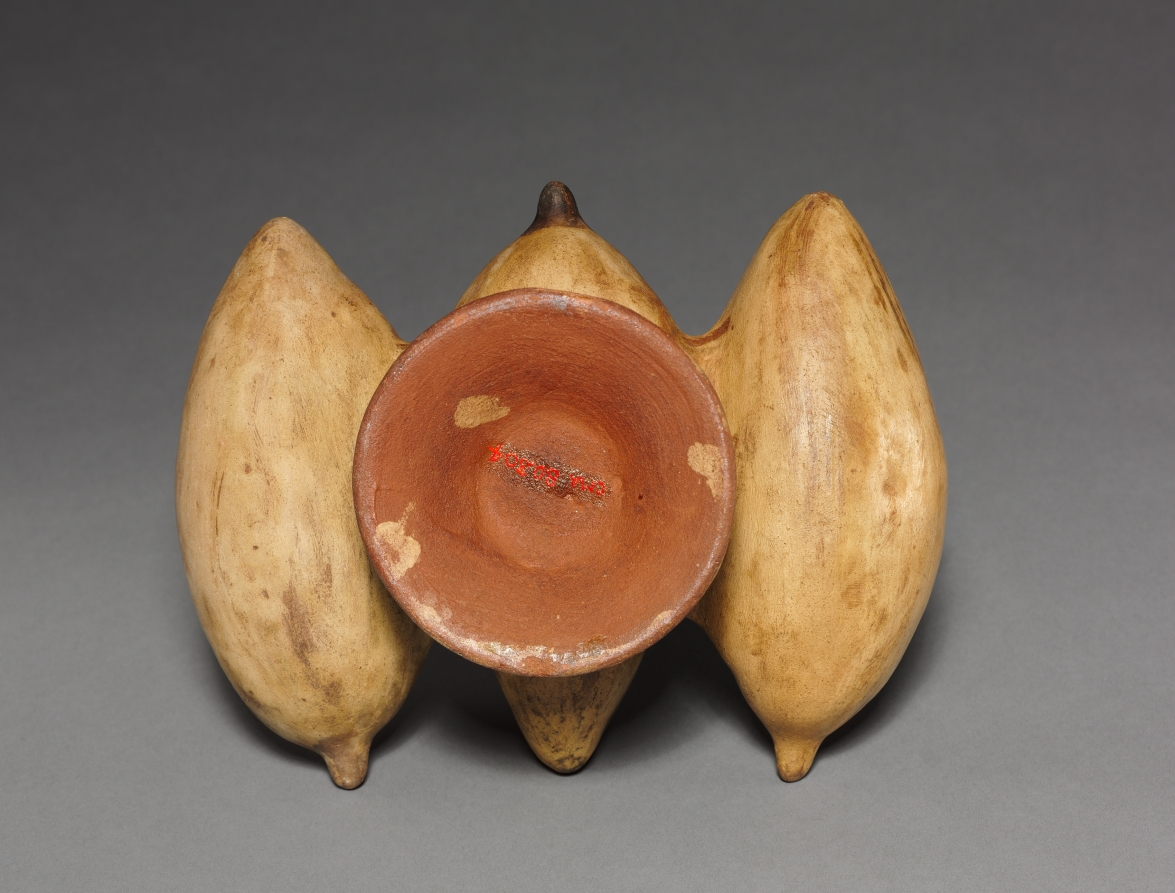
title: Stirrup Jar with Monkey and Three Fruits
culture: Peru, North Coast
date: 1000 or later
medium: red earthenware decorated with cream-colored slip and brown pigment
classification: Ceramic